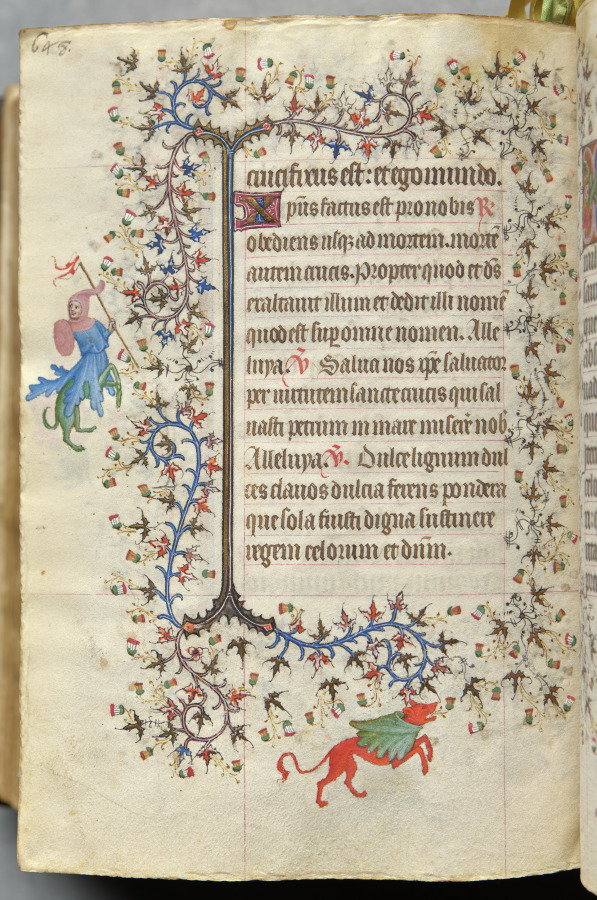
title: Hours of Charles the Noble, King of Navarre (1361-1425), fol. 318v, Text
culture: France, Paris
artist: Master of the Brussels Initials and Associates (French)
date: c. 1405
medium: ink, tempera, and gold on vellum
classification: Bound Volume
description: This precious volume was obviously highly prized by its owner, the French-born King of Navarre, who had his coat of arms painted on no less than twenty folios. Rather than directly commissioning this manuscript from a specific workshop, it seems that Charles the Noble acquired his book of hours -- perhaps ready-made for the luxury market -- while on a trip to Paris in 1404-05. A collaborative effort, six painting styles are evidenced within the pages of this codex, those of two Italians, two Frenchmen, and two Netherlanders. The painter who was responsible for the planning and decoration of the book, and who produced seventeen of the large miniatures, was a Bolognese artist known as the Master of the Brussels Initials. His principal assistant, responsible for most of the borders, was a Florentine who signed his name "Zecho" da Firenze on folio 208 verso.